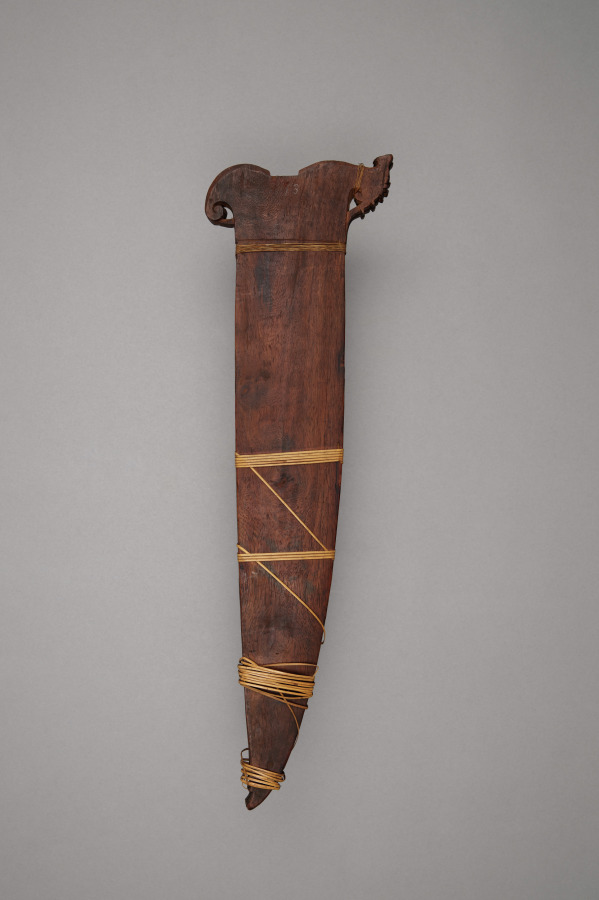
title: Scabbard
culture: Philippines, Mindanao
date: 1800s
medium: Wood with rattan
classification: Arms and Armor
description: The flared form of this wooden scabbard indicates that it was made to house a barong blade, probably belonging to the Maranao, Tausug, or Yakan people. The upper section features incised scroll-like motifs, similar to the stylized floriate designs common in southern Philippine okir carving traditions. Several bands of rattan lashings reinforce the sheath, adding both structural stability and decorative rhythm.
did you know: The graceful, winglike profile of the scabbard’s mouth is typical of work made by the Muslim populations of the southern Philippines.